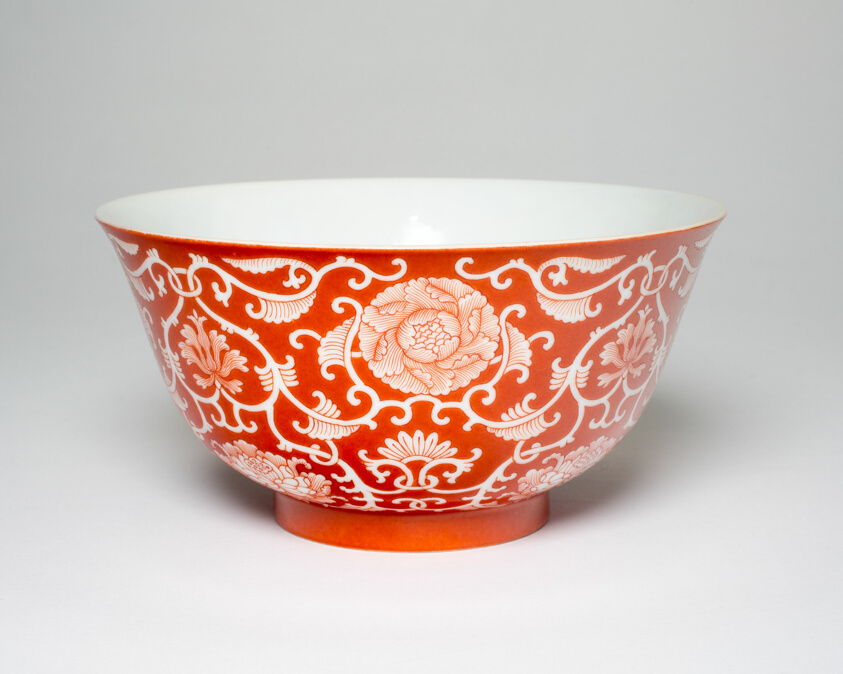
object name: Vessel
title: Bowl with Floral Scrolls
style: Chinese (culture or style)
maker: China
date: Qing dynasty (1644–1911), Daoguang period (1821–1850)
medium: Porcelain painted in overglaze red enamel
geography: China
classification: bowl; porcelain; dish (vessel); asian art; ceramics; vessel